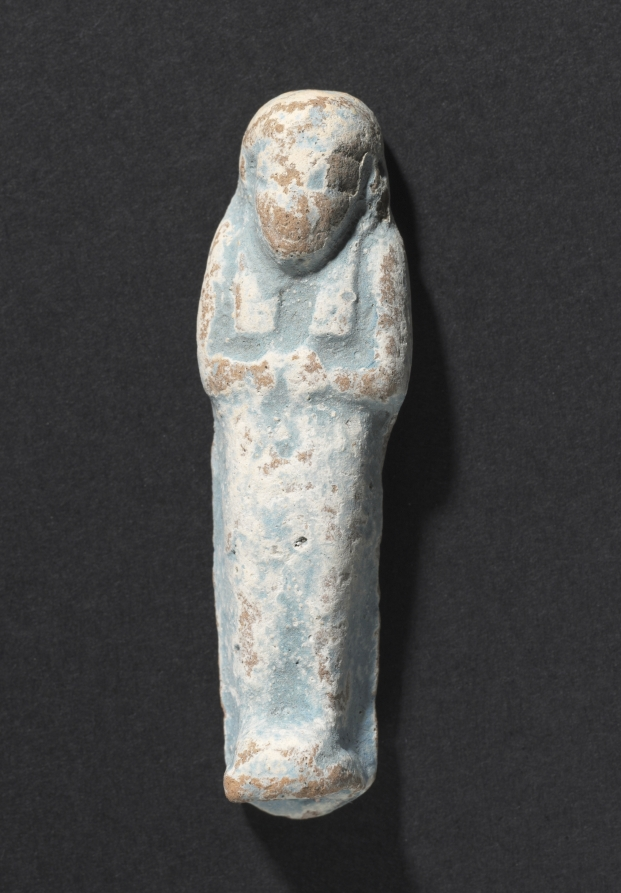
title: Shawabty of Ditamenpaankh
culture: Egypt, Late period (715–332 BCE), Dynasty 25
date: 715–656 BCE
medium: terracotta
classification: Funerary Equipment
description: High demand for shawabtys in the Late Period, a time when as many as 400 or more shawabtys were placed in the tomb with the deceased, gave rise to a specialized container for storing them: the shawabty box. This example is inscribed for the lady of the house, Ditamenpaankh, and was probably one of a pair originally made for her. The single-masted boat on the box's lid is perhaps an allusion to the pilgrimage of the deceased to the holy city of Abydos, the cult city of Osiris, king of the dead. The shawabtys inside are crude, mass-produced examples cast in an open mold. Made of terracotta, their blue paint imitates more costly shawabtys made of faience. As for the shawabty spell, it has been removed from its traditional location on the shawabty's front and relocated onto the sides of box, where it needed only to be written once, thus expediting production.